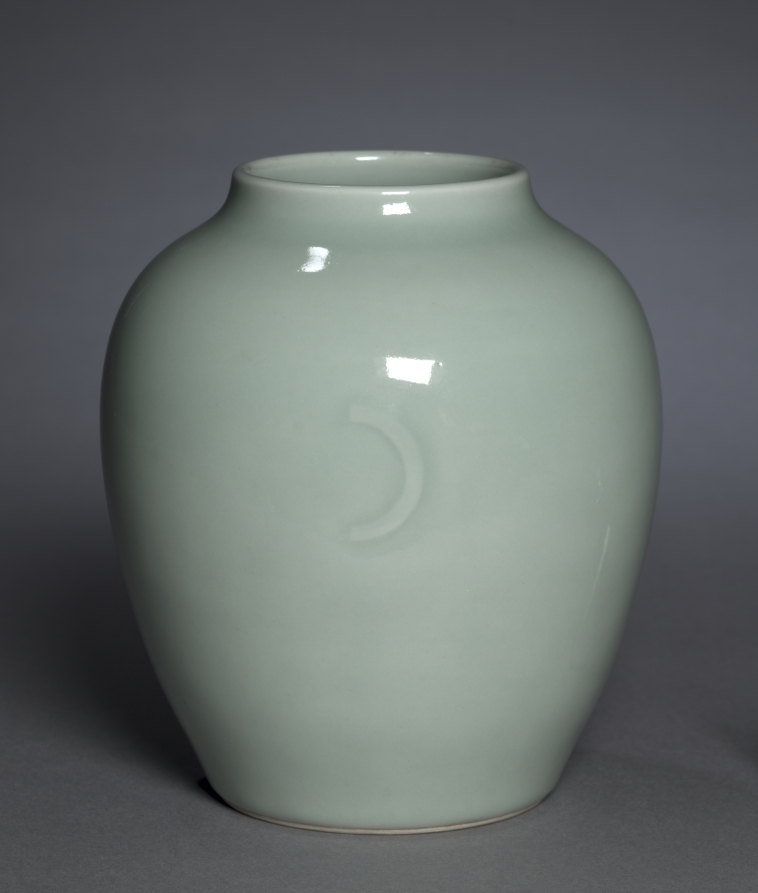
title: Jar with Crescents in Relief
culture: China, Jiangxi province, Jingdezhen kilns, Qing dynasty (1644-1911), Qianlong mark and reign (1736-95)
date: 1736–95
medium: porcelain with applied decoration and celadon glaze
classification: Ceramic